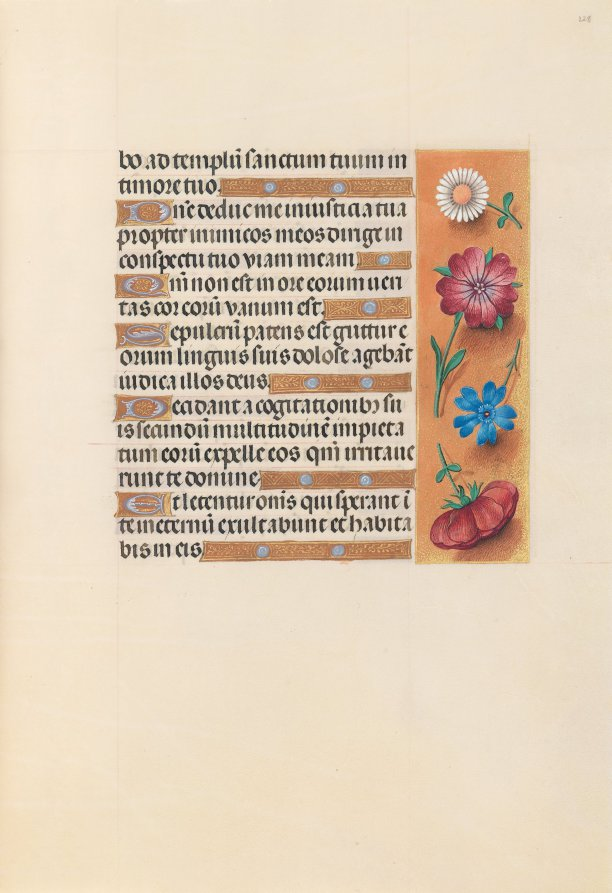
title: Hours of Queen Isabella the Catholic, Queen of Spain: Fol. 228r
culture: Flanders, Ghent and Bruges, late 15th century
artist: Master of the First Prayerbook of Maximillian (Flemish, c. 1444–1519)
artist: and Associates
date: c. 1500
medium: ink, tempera, and gold on vellum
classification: Bound Volume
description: This manuscript was illuminated by a circle of at least five highly organized manuscript painters active in the Flemish cities of Ghent and Bruges. The principal illuminator was Alexander Bening, who painted the majority of the book's miniatures. Manuscripts produced by this circle of artists are renowned for the decoration of their borders, which typically feature a rich variety of realistically-painted flowers, birds, and butterflies. This prayer book, called a book of hours, was intended not for a cleric, but for the private devotions of a lay person-in this case, Isabella the Catholic, Queen of Spain (1451-1504). Isabella's coat of arms embellishes the book's frontispiece. It is unlikely that the book was commissioned by the Queen herself; rather, she probably received it as a diplomatic gift from someone courting her patronage, perhaps Cardinal Francisco Jimenez de Cisneros. A Franciscan friar, Jimenez was dependent upon Isabella for his advancement, first to the post of Queen's confessor in 1492, and then to Archbishop of Toledo in 1495.